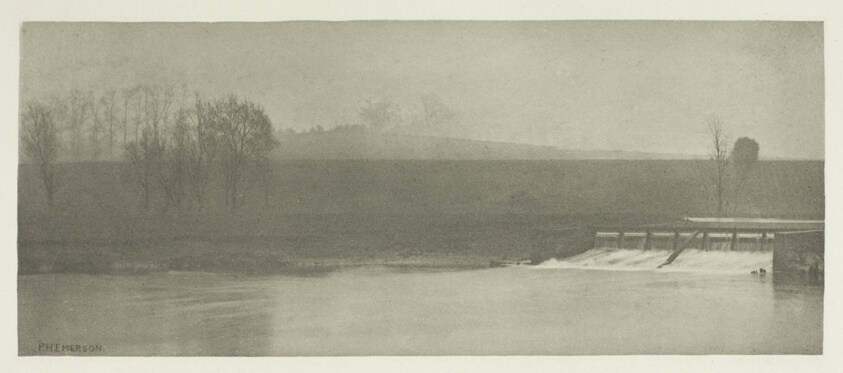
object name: Photograph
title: A Rainy Day at Flander's Weir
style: 19th century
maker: Peter Henry Emerson (English, born Cuba, 1856–1936)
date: 1880s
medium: Photogravure, plate XXIV from the album "The Compleat Angler or the Contemplative Man's Recreation, Volume II" (1888)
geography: England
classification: photogravure; photomechanical process; photography; photograph